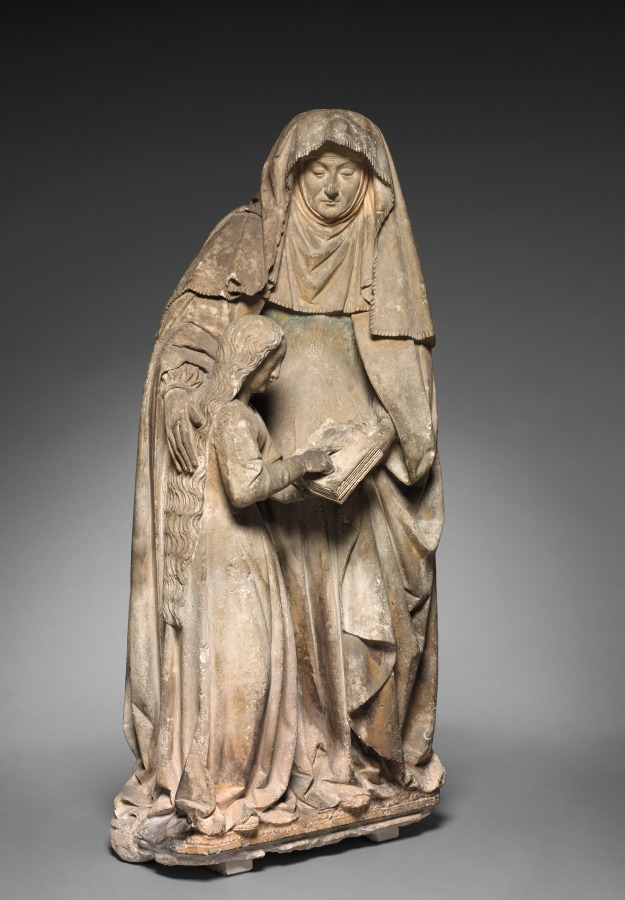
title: Education of the Virgin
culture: France, Bourbonnais, 16th century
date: c. 1500–1510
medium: limestone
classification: Sculpture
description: This relief depicts the young Virgin Mary learning to read at the knee of her mother Anne.